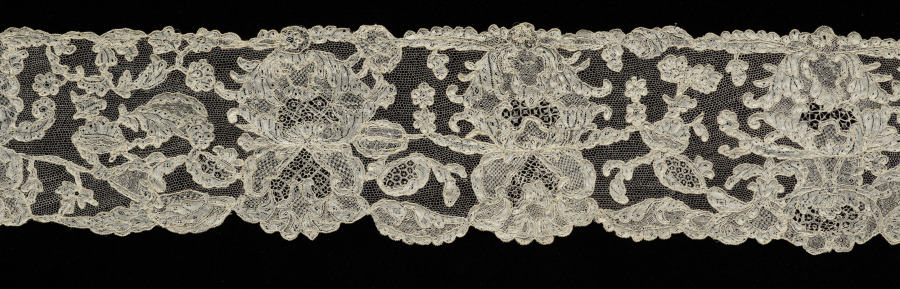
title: Lace Lappet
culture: Italy, Burano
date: 1700–1740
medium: Silk: needle lace (Burano Point)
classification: Lace